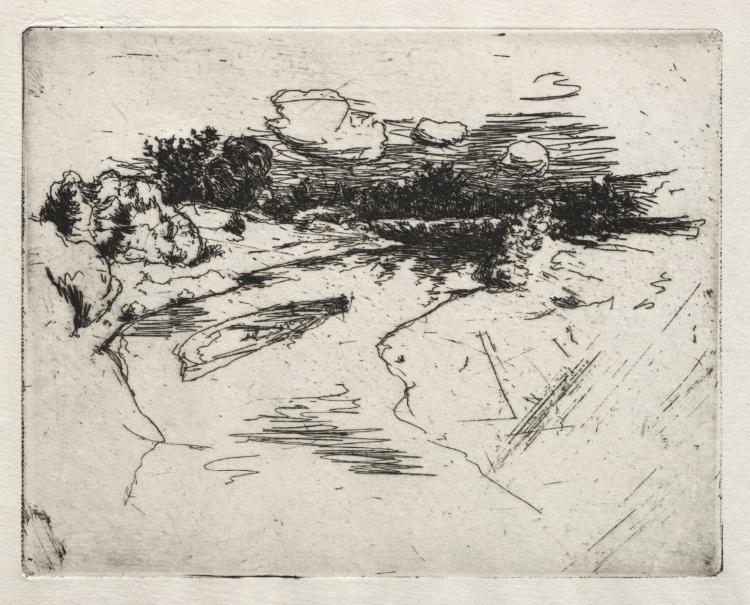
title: Miami River, near Cincinnati, Ohio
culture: America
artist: John Henry Twachtman (American, 1853–1902)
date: 1879–80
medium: etching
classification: Print